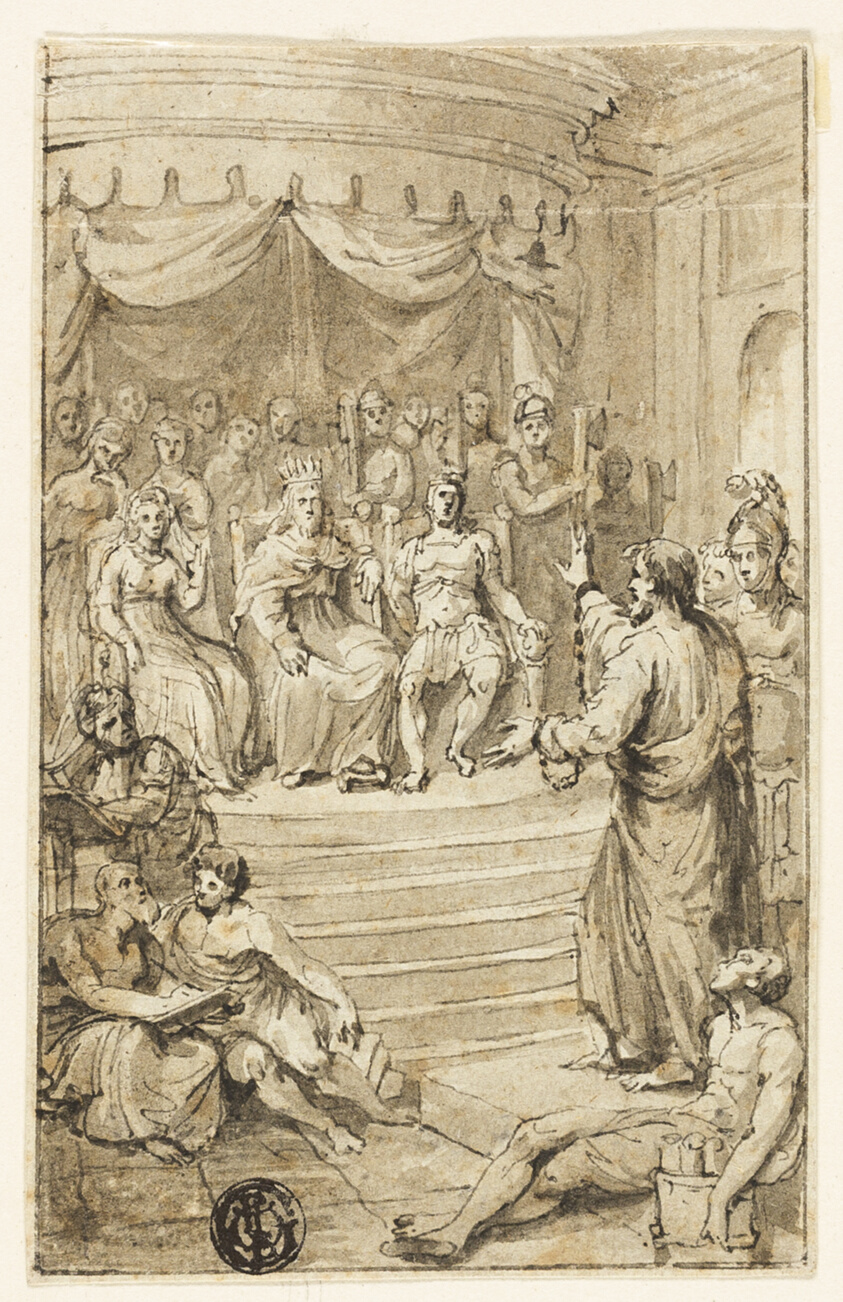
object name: Drawing and Watercolor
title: Paul Before Festus and Agrippa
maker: Charles Reuben Ryley (English, c. 1752-1798)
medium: Pen and wash on paper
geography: England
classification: pen and ink drawings; drawings (visual works); prints and drawing